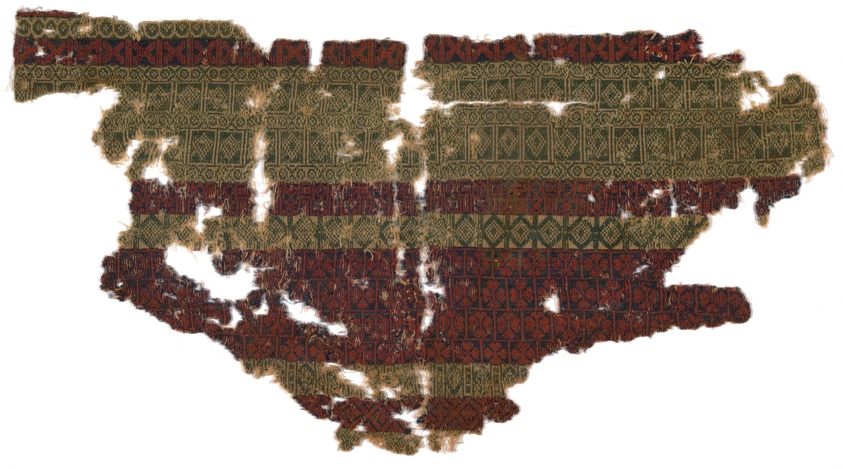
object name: Textile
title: Fragment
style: roman period (egyptian), syrian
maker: Egypt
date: Roman period (30 B.C.– 641 A.D.), 5th/6th century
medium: Wool, double weave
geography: Egypt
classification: textile; weaving